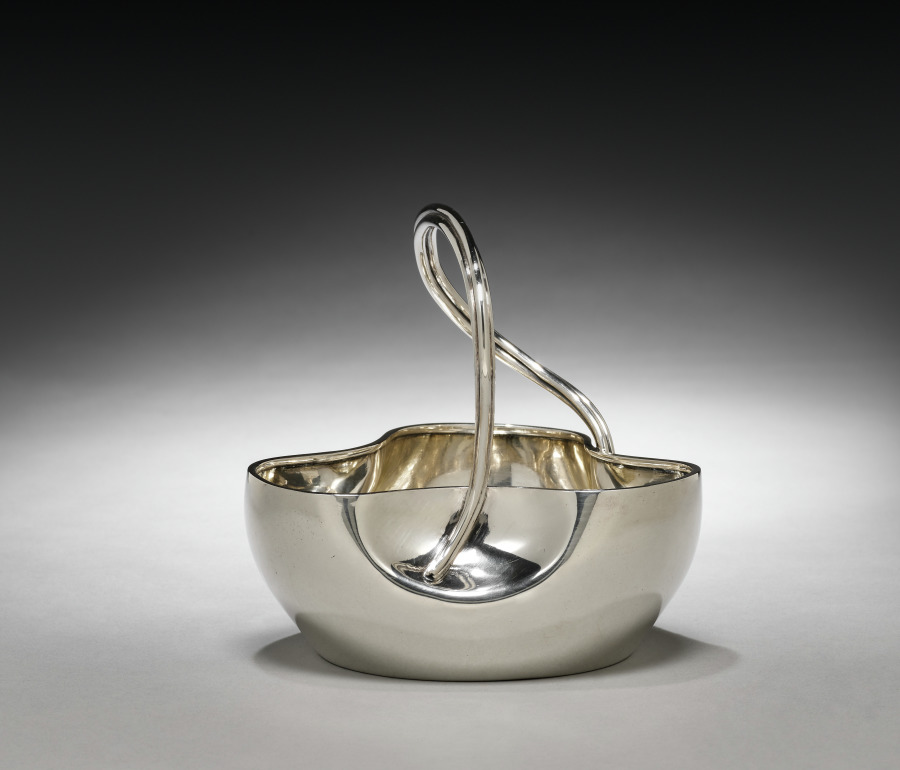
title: Bowl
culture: Russia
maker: House of Fabergé (Russian, 1842–1918)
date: 1895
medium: silver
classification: Silver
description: While Fabergé mainly produced objects with historicist ornamentation drawing upon earlier periods, the firm was also attentive to the latest fashions in the European decorative arts. This silver bowl is executed in the Art Nouveau style popular at the time. Its indented body and the asymmetrical handle convey a sense of liquid movement, accentuated by the undulating reflections on the silver surface.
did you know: The size suggests that it was used either for sweets or simply displayed for its aesthetic value.